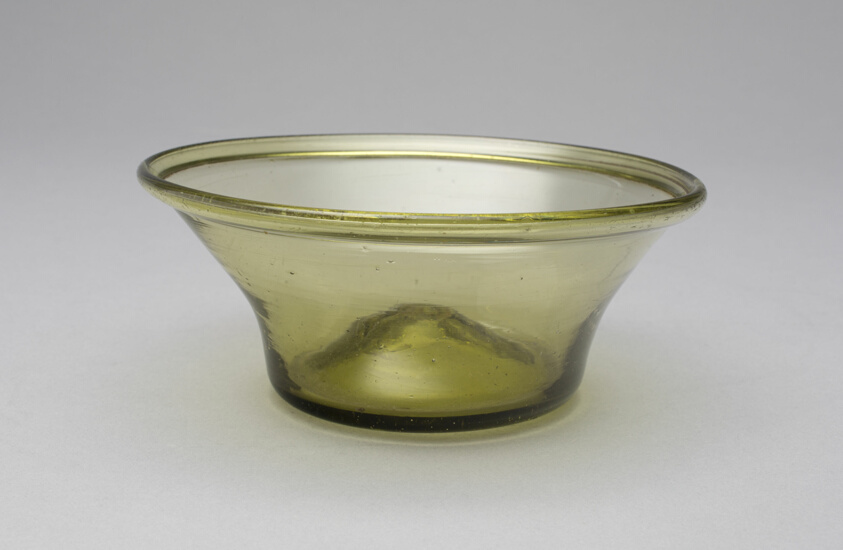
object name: Glass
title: Pan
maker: Artist unknown (American, 19th century); Possibly Kent, Ohio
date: 1824–32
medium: Blown glass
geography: Ohio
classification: container; glass; dish (vessel); american decorative arts; american arts; decorative arts